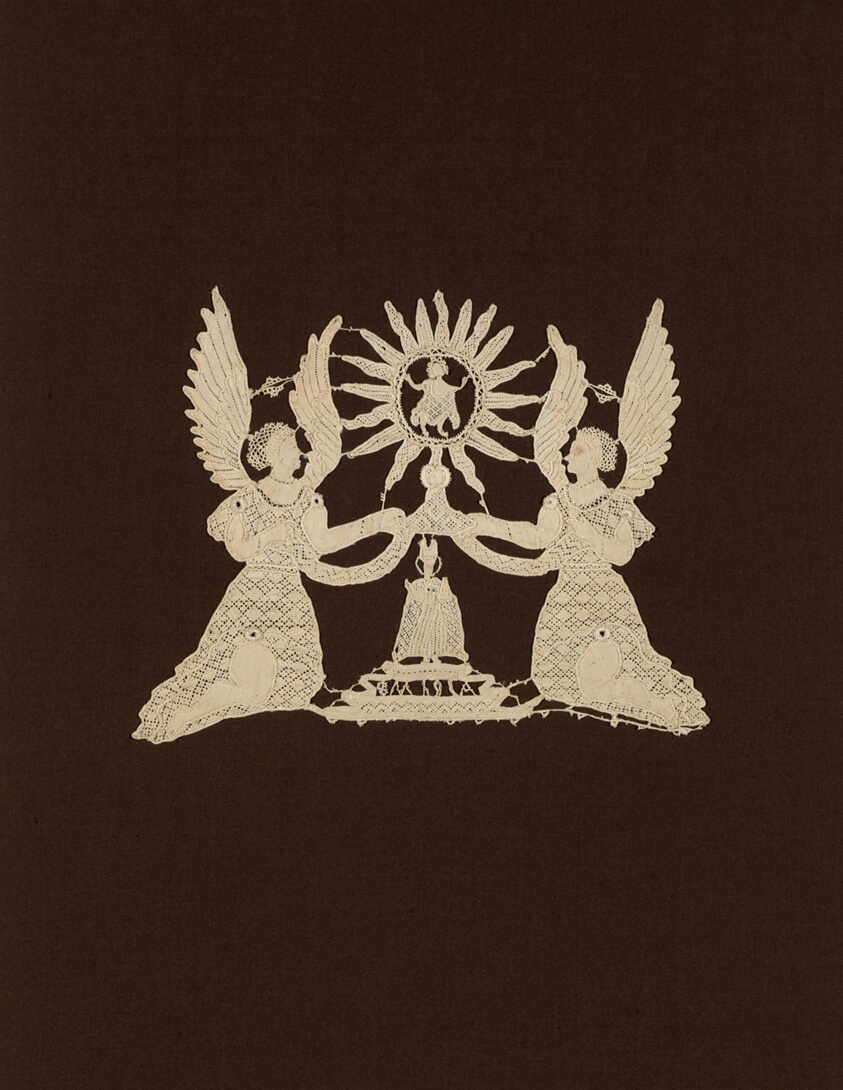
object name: Textile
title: Panel (Center Motif For a Liturgical Piece)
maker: Europe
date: 1775/1800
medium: Linen, needle lace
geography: Europe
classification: textile; lace - needle